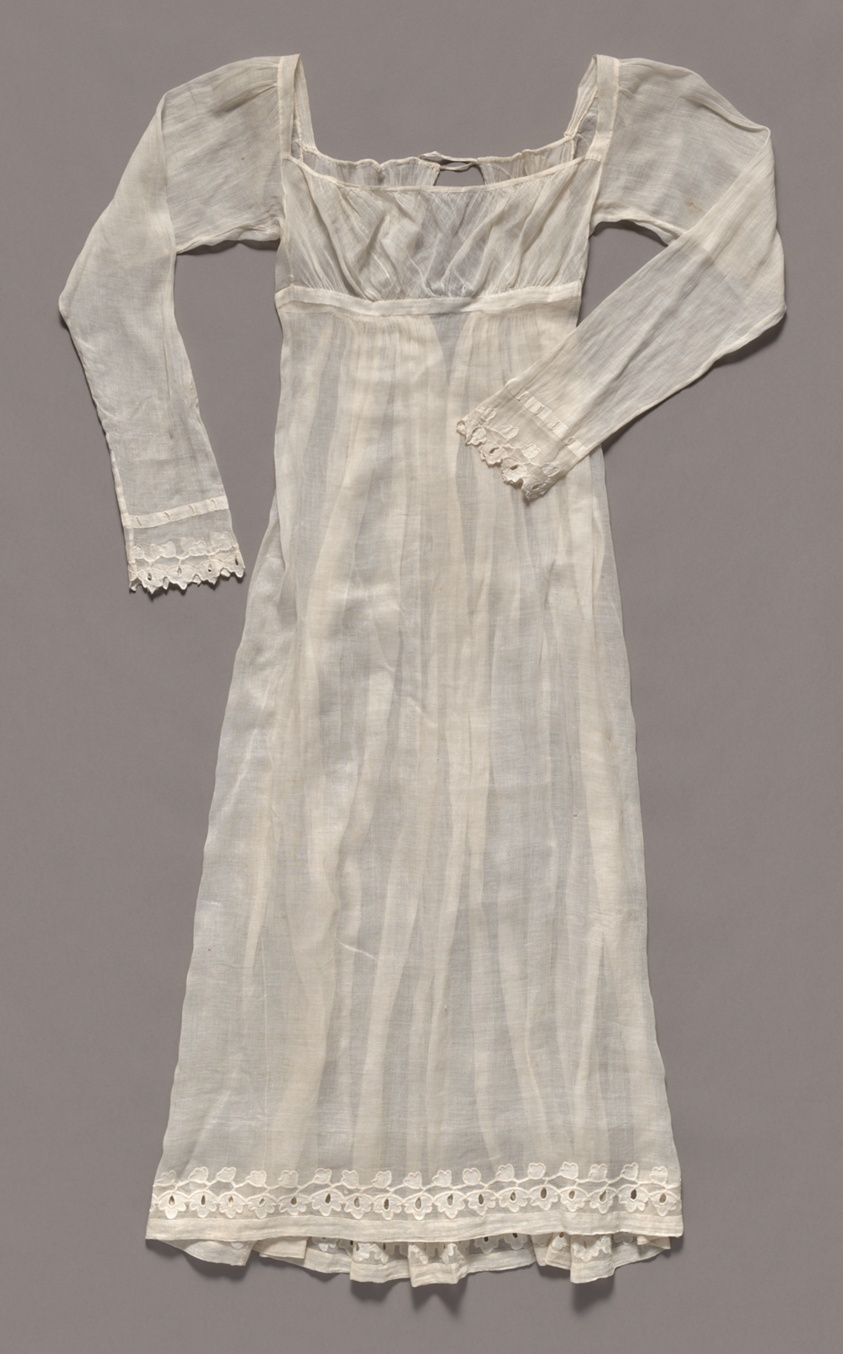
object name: Costume and Accessories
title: Day Dress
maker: French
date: c. 1805-1815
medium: Cotton, plain weave; embroidered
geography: France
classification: costume